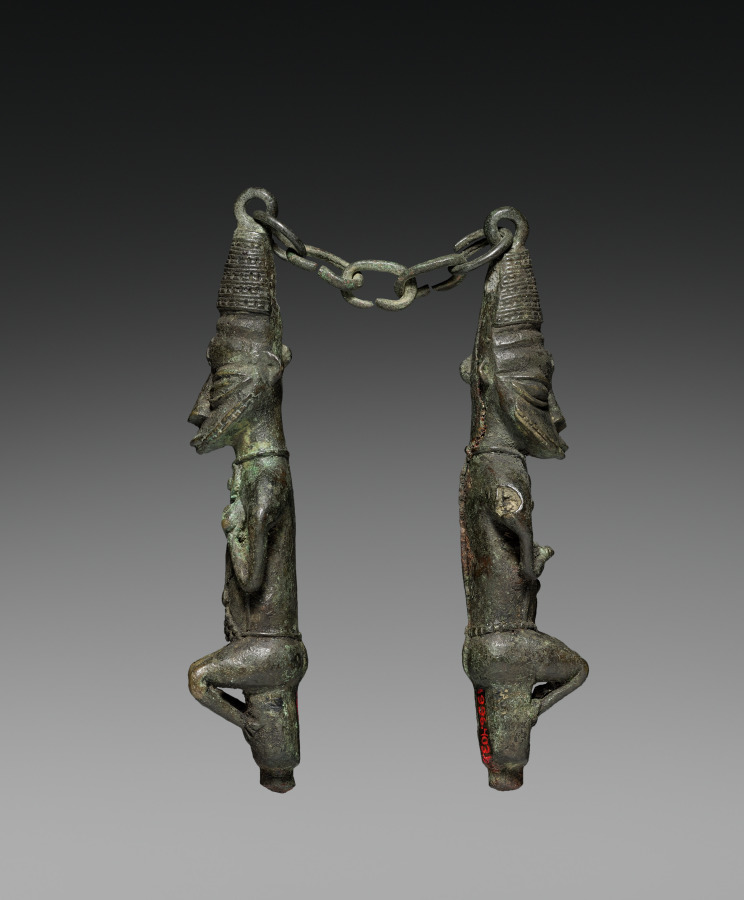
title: Pair of Ritual Staffs (ẹdan Ògbóni)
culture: Africa, West Africa, Nigeria, Yorùbá-style maker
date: possibly 1800s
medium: Copper alloy and iron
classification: Sculpture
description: The chain connecting these two figures allows them to be worn in public by a member of the Ògbóni or Òṣùgbó association as authority emblems. The male on the right gives the association’s typical salute by clasping his left fist on the right one, while the female on the left holds her breasts as a sign of welcome and generosity. The use of copper alloy and iron expresses Ògbóni/Òṣùgbó's concerns with longevity and durability.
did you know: Imagine how this would look when its owner wore it; the chain would go around the back of the neck and the figures would rest on their chest.